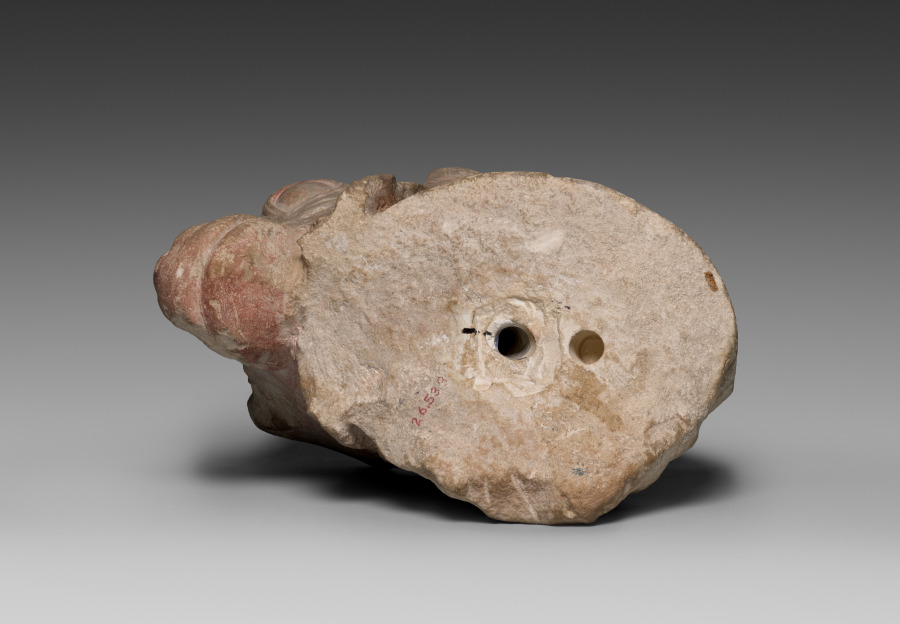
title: Fragment of a Goat's Head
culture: Greece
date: c. 500–475 BCE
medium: limestone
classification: Sculpture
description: Initially identified as a horse head, this fragmentary sculpture, once painted reddish-brown, has a beard, indicating that it depicts a goat. Its large size, however, together with its neck position and unusual round eye, have all prompted questions. Was the head broken from a rearing goat? Or did it represent Pan, the rustic shepherd god often depicted as half-man, half-goat? If Pan, some scholars have connected it with a fifth-century BC Athenian sanctuary erected to thank the god for aid in battle. An alleged provenance near the Athenian Acropolis supported this idea, but scientific tests suggest otherwise.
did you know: Pan, the goat-headed god, is often called a son of Hermes, but sources disagree.